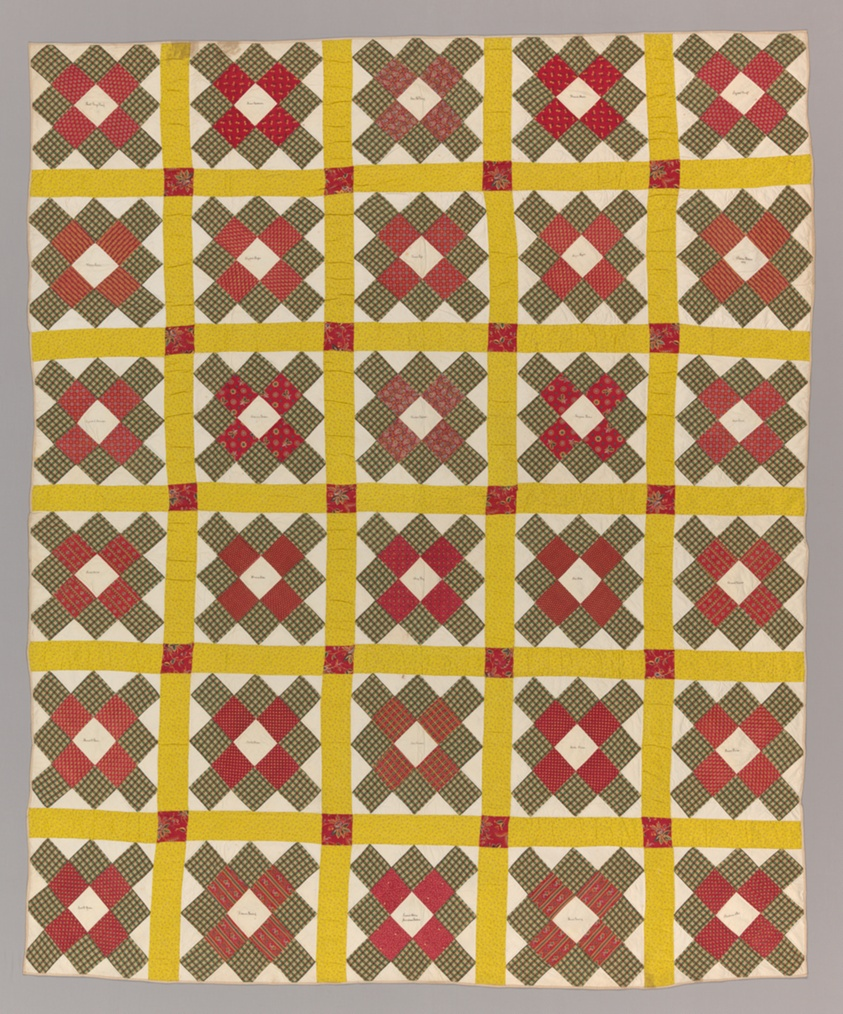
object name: Textile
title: Bedcover ("Album Patch" or "Signature" Quilt)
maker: Possibly Hunderdon County, New Jersey, United States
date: 1847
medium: Cotton, plain weaves; printed; quilted; backed and edged with cotton, plain weave; pieced; printed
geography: United States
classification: needlework - quilt; textile